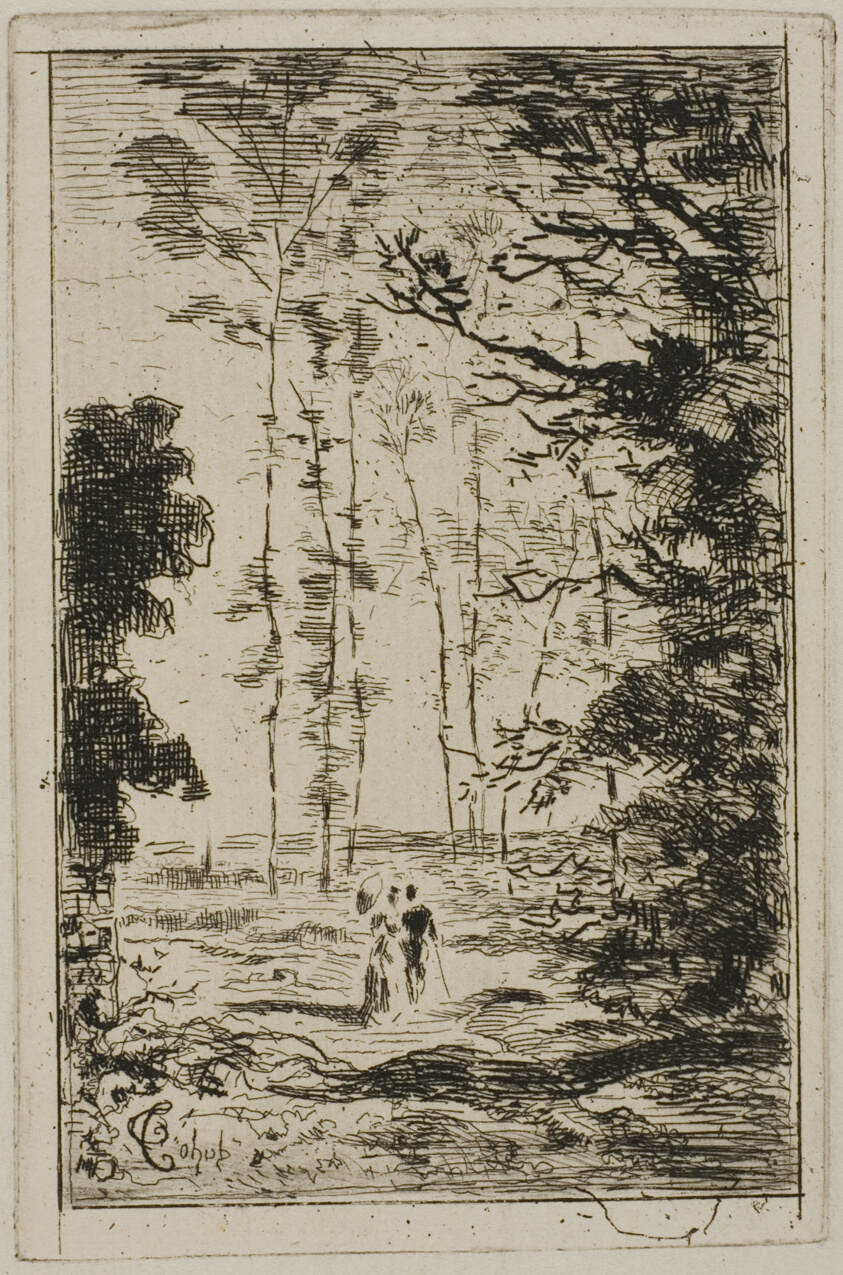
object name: Print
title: Small Vertical Landscape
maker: Félix Hilaire Buhot (French, 1847-1898)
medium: Etching on ivory laid paper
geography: France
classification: etching; print; prints and drawing